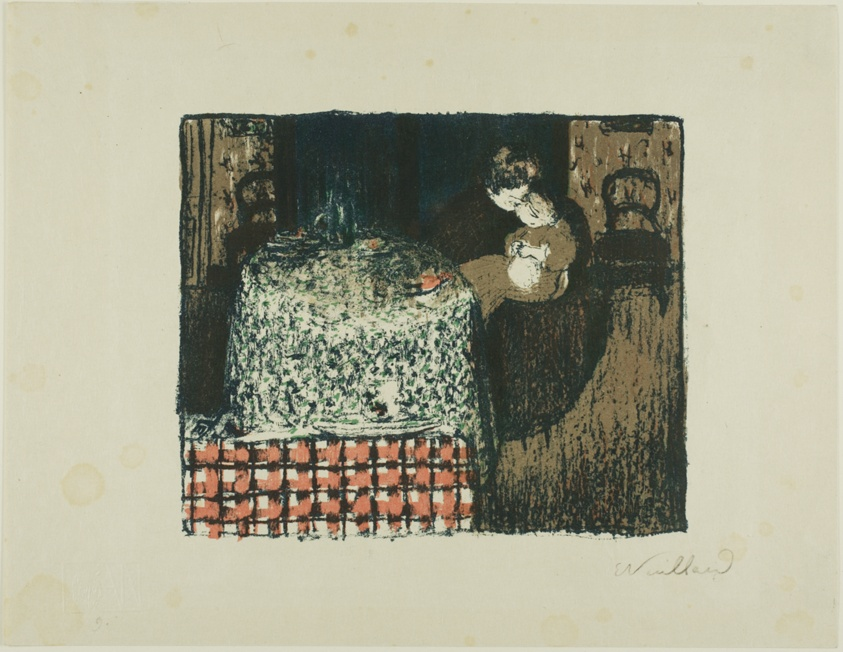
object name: Print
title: Maternity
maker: Edouard Jean Vuillard; French, 1868-1940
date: 1896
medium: Color lithograph on cream Japanese paper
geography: France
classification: lithograph; print; prints and drawing